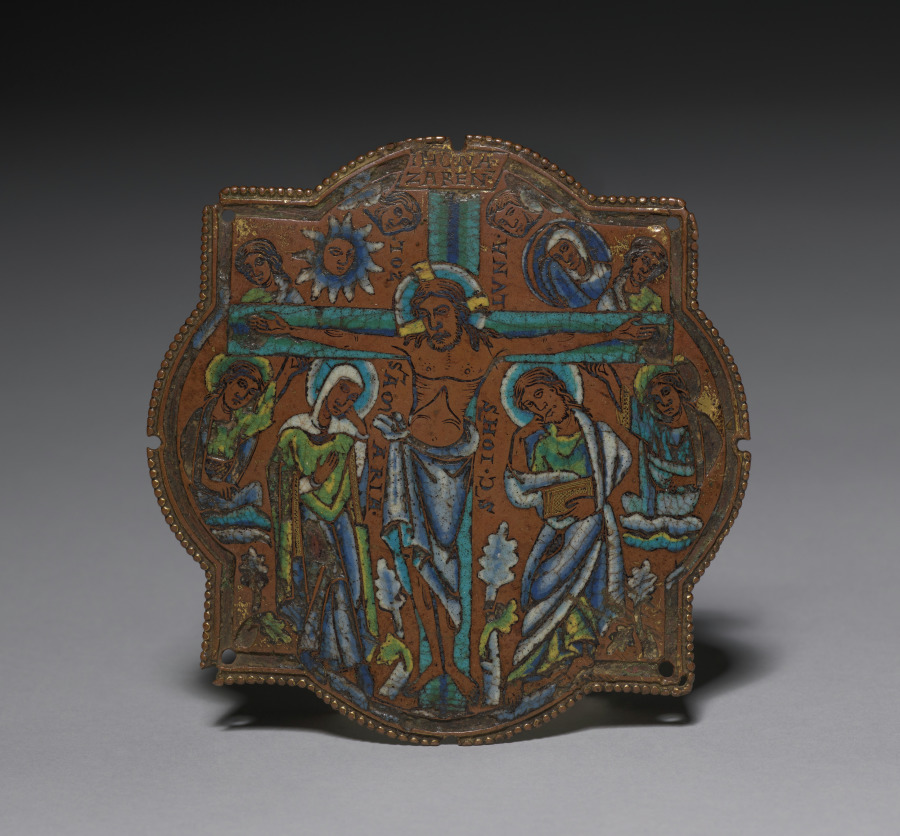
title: Enamel Plaque: Crucifixion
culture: Valley of the Meuse, 12th century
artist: workshop of Godefroid of Claire (Mosan)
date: 1100s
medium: champlevé enamel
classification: Enamel